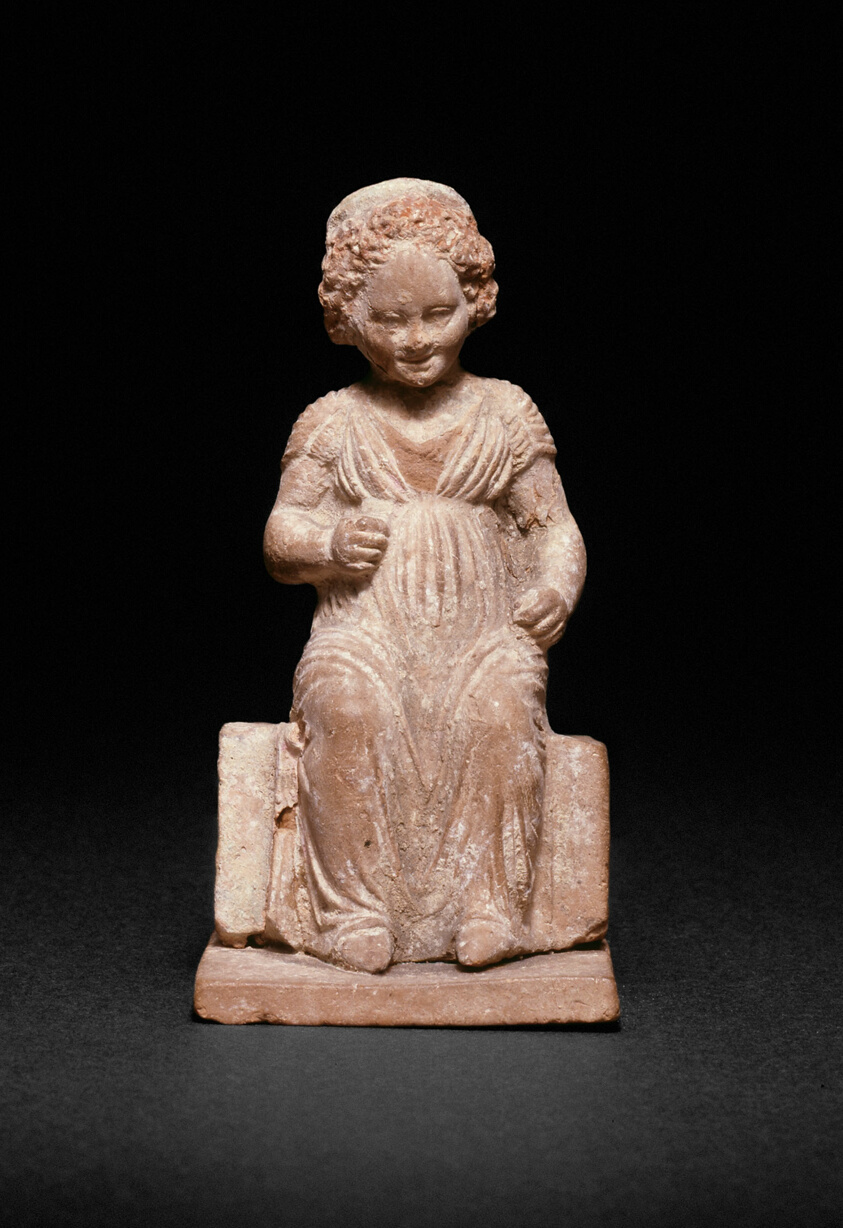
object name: Sculpture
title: Statuette of a Seated Girl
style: hellenistic, attic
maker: Greek; Athens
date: 330-320 BCE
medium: terracotta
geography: Athens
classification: statuette; earthenware; ceramics; sculpture; ancient art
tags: youth, Greek